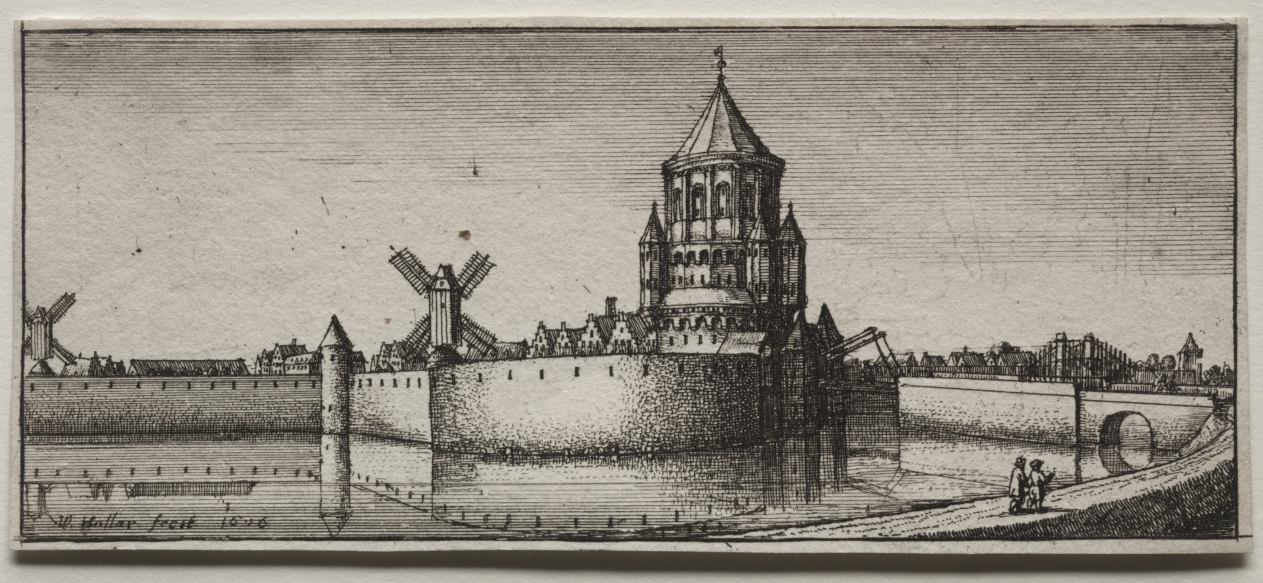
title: Moated Town Gate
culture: Bohemia, 17th century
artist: Wenceslaus Hollar (Bohemian, 1607–1677)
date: 1676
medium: etching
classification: Print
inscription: inscribed, lower left, in plate: W. Hollar fecit 1676